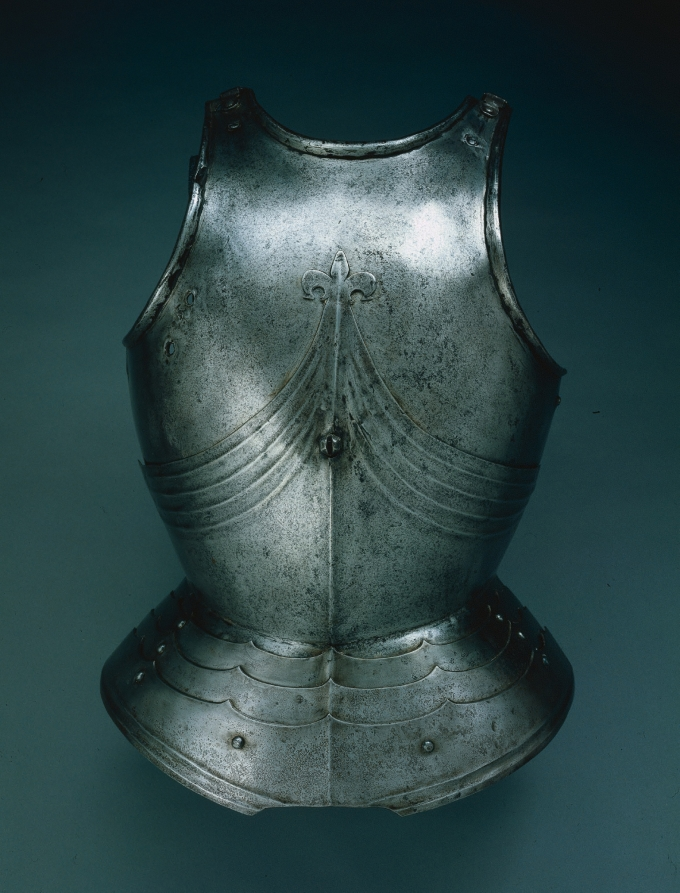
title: Gothic Breastplate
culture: South Germany or Austria, Innsbruck, late 15th century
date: late 1400s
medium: steel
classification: Arms and Armor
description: This elegantly constructed breastplate consists of two primary plates of steel fastened at center by a rivet. The lower plate is embellished with a border of embossed flutes that converge upward and terminate in a fleur-de-lys. The pair of rivet holes in the upper right breast accommodated a lance rest, now lost.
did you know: As a result of the introduction of plate armor, the shield became superfluous and gradually disappeared from use.